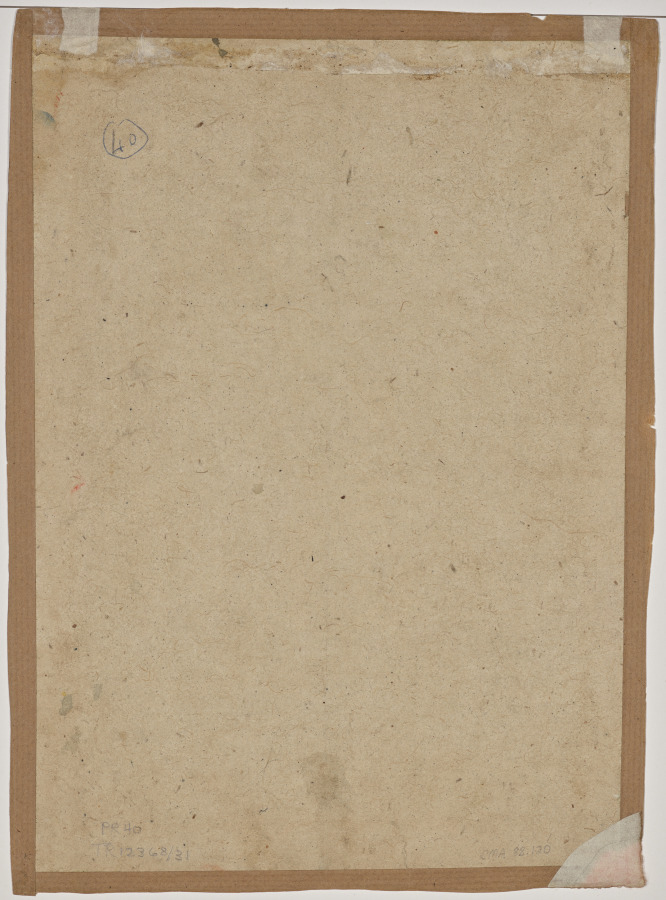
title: Radha and Krishna in the Rain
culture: India, Rajasthan, Bundi school, 18th century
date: c. 1780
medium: Gum tempera, ink, and gold on paper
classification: Painting